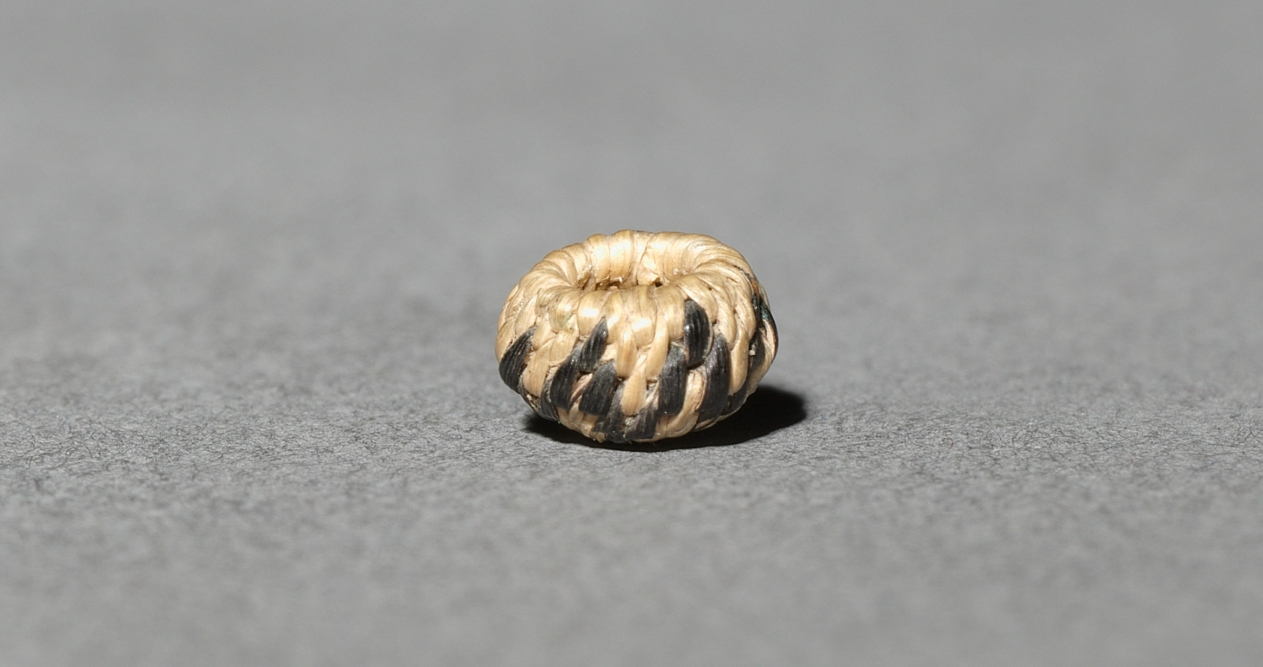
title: Miniature Round Basket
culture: California, Pomo, late 19th-early 20th century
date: late 1800s-early 1900s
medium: plant materials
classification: Basketry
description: Miniature baskets were made to demonstrate the basket-maker’s virtuoso skill, and these tiny marvels seem to be no exception -- the smallest are just a few millimeters wide but still patterned. For such fine work, dexterity was required as much for preparation of materials as for weaving.